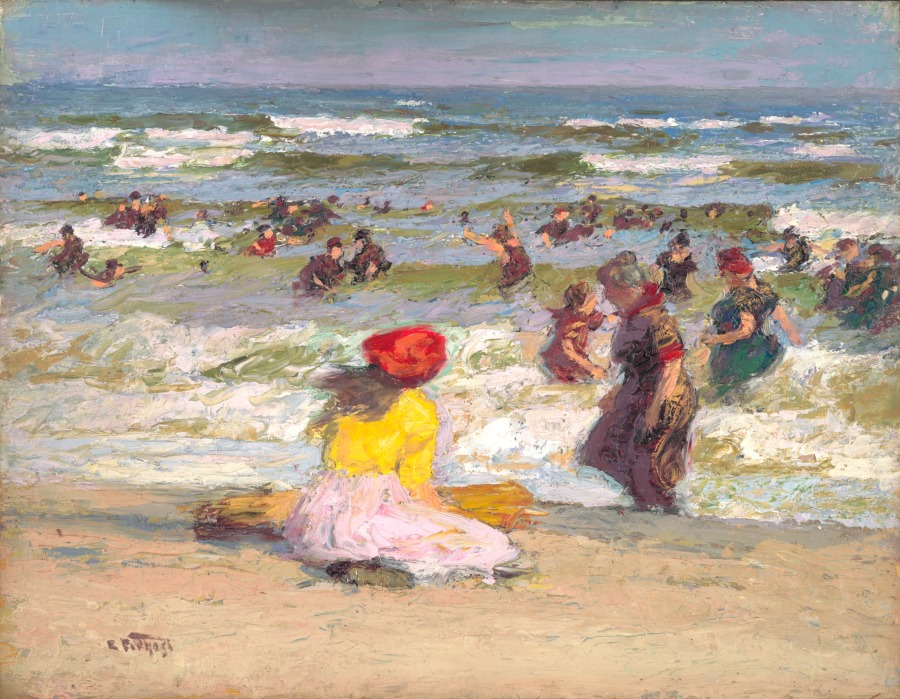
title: In the Surf (recto); Beach Study (verso)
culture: America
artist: Edward H. Potthast (American, 1857–1927)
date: c. 1910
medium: oil on panel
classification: Painting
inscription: recto bottom left: E Potthast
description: Born in Cincinnati, Potthast studied in Munich and Paris before returning to the United States, where he began spending summers along the coast of New England. There he studied the carefree seaside activities of bathers and picnickers. Although he never married, he was particularly fond of painting young mothers and their children.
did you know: During the early 1900s, modesty dictated women’s bathing suit designs featuring long, loose-fitting skirts.